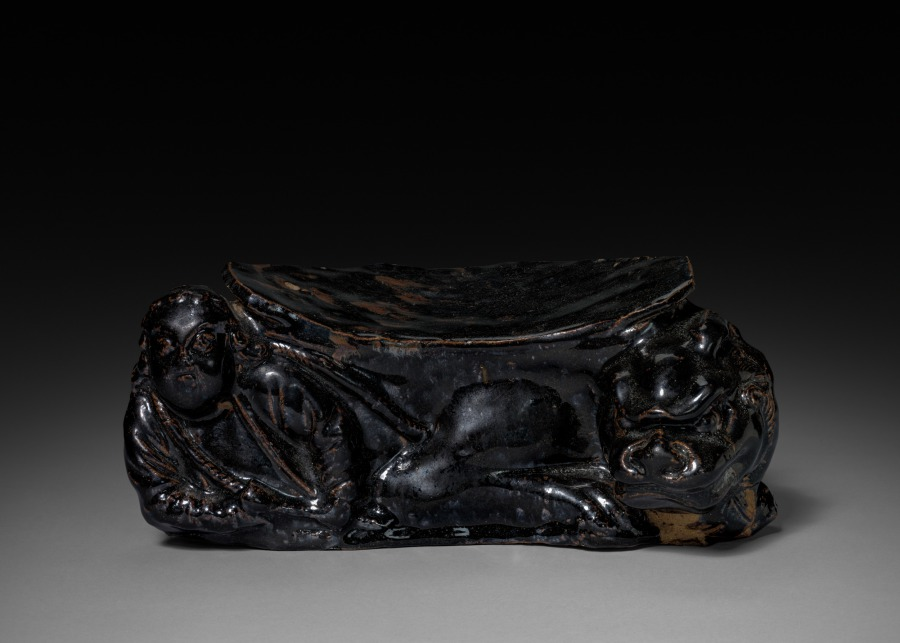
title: Pillow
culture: China, Yuan dynasty (1271-1368)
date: 1100s-1200s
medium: Glazed stoneware, Cizhou ware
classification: Ceramic